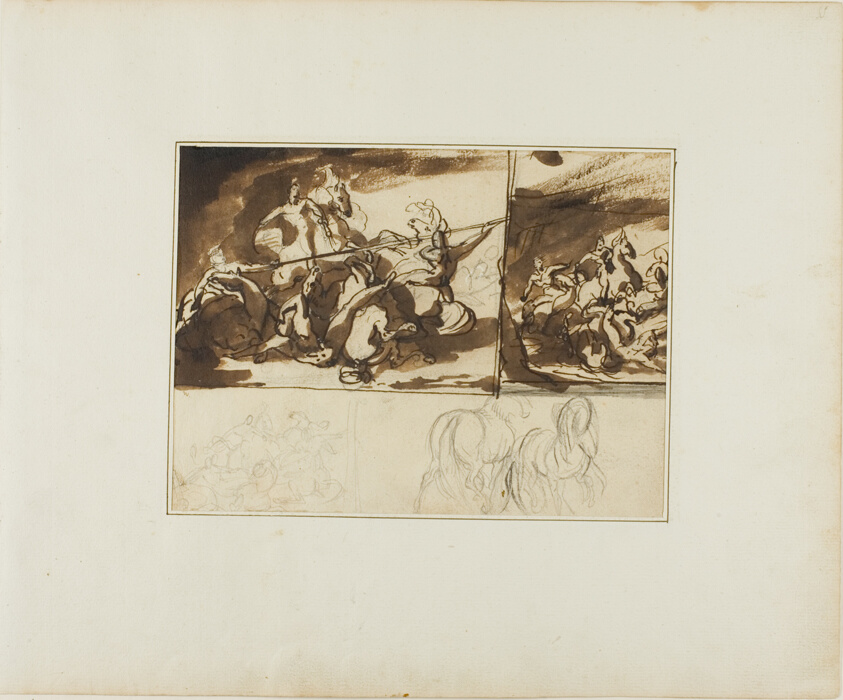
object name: Drawing and Watercolor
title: Three Sketches of an Equestrian Battle and a Sketch of Two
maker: Jean Louis André Théodore Géricault (French, 1791-1824)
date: 1813/14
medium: Pen and brown ink with brush and brown wash, over graphite, and black crayon on cream wove paper, perimeter mounted on ivory laid paper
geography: France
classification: pen and ink drawings; drawings (visual works); prints and drawing